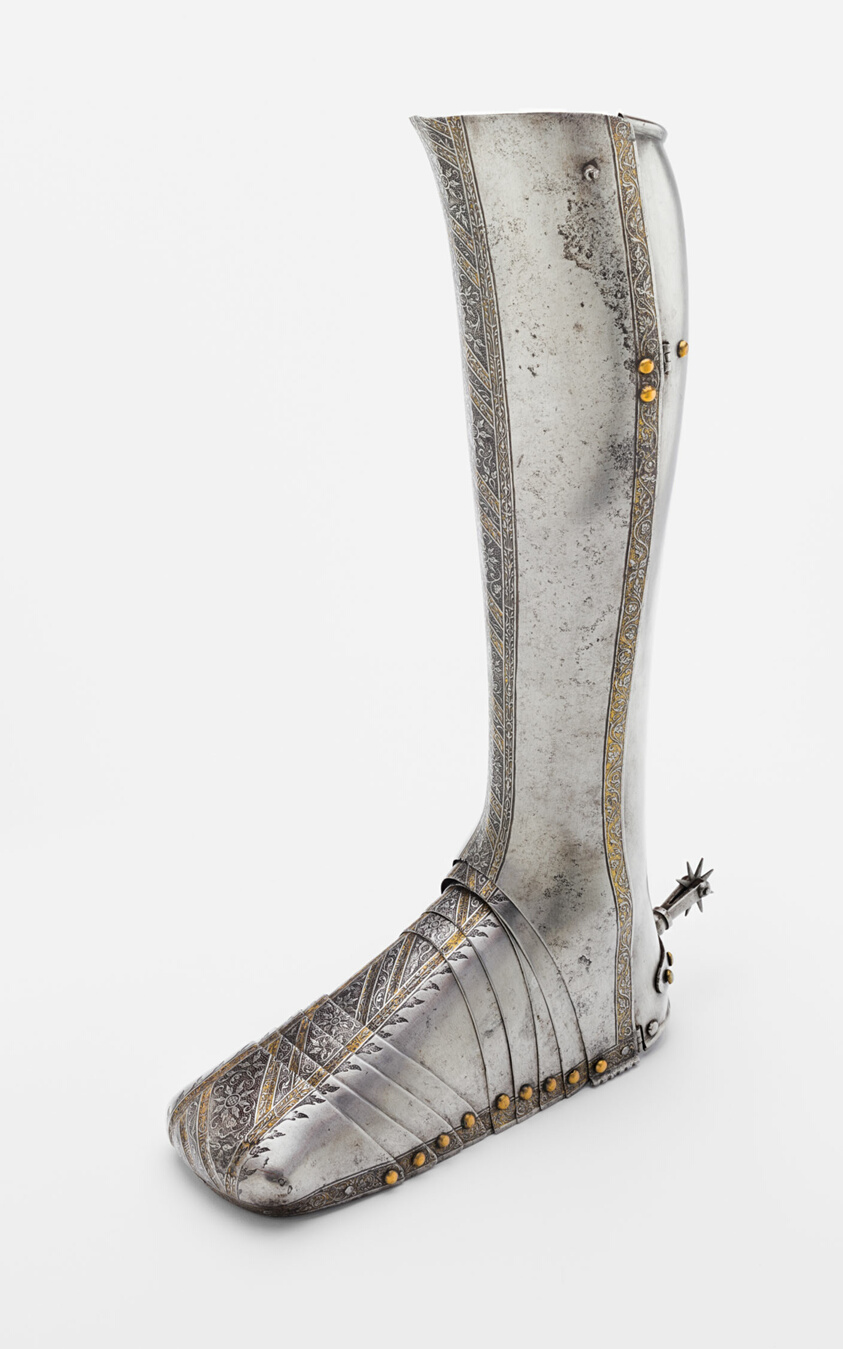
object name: Armor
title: Left Greave and Sabaton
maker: Attributed to Wolfgang Grosschedel; (German, 1517-1562) Landshut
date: 1540/50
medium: Steel and gilding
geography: Landshut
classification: arms and armor; suit-element; armor